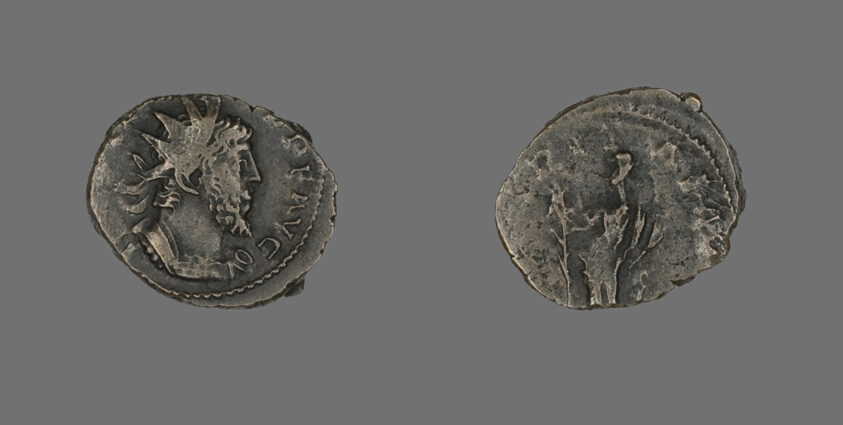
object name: Coin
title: Coin Portraying Emperor Tetricus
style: roman (ancient, style or period), ancient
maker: Roman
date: 271-274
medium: Bronze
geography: Roman Empire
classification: coin; ancient art